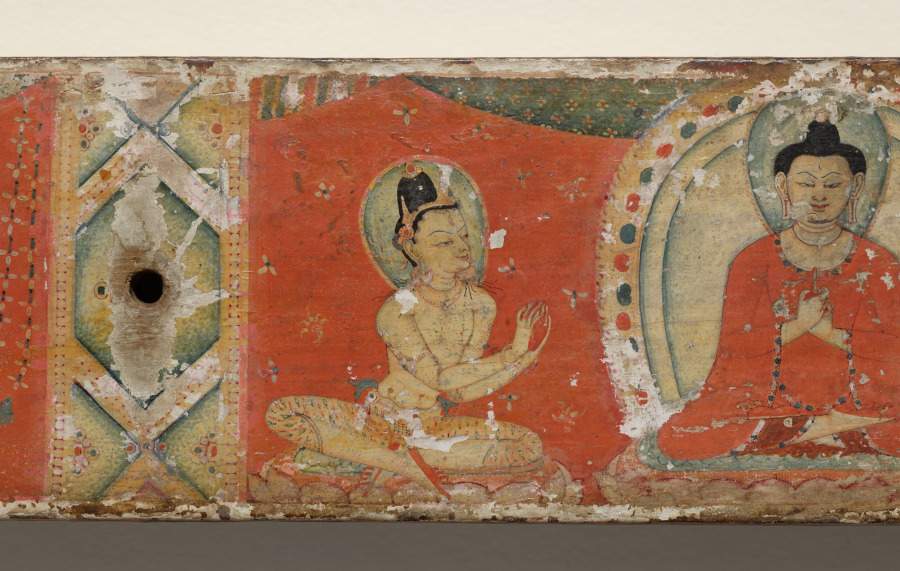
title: Ratnasambhava, Akshobhya, Vairochana with attendants, Amitabha, and Amoghasiddhi, Top cover, from a Manuscript of the Perfection of Wisdom in Eight Thousand Lines (Ashtasahasrika Prajnaparamita-sutra)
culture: Eastern India, Bihar, Vikramashila Monastery. Paintings: Nepal, Kathmandu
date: Sunday, September 14, 1119 (year 239 of the Newar Samvat in the month of Ashvina)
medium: Covers: Gum tempera, colors, and paper on wood; pages: gum tempera and ink on palm leaves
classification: Painting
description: The inner side of the top cover is fully painted with images of the Five Cosmic Buddhas of Esoteric Buddhism. Each one has a different color, meaningful hand gesture, and is associated with a spatial direction. In the center is the white Vairochana holding his hands in the enlightenment mudra. On either side of the binding holes are the other four Cosmic Buddhas Akshobyha (blue, earth-touching mudra, east) and Amitabha (red, meditation mudra, west), and on the ends are Ratnasambhava (gold, gift-giving mudra, south) and Amoghasiddhi (green, fear-not mudra, north). The top side is covered with ritual materials indicating that this book was once an object of worship.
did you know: The Five Tathagatas could be the source of visions that would help Buddhist practitioners on the path to enlightenment.